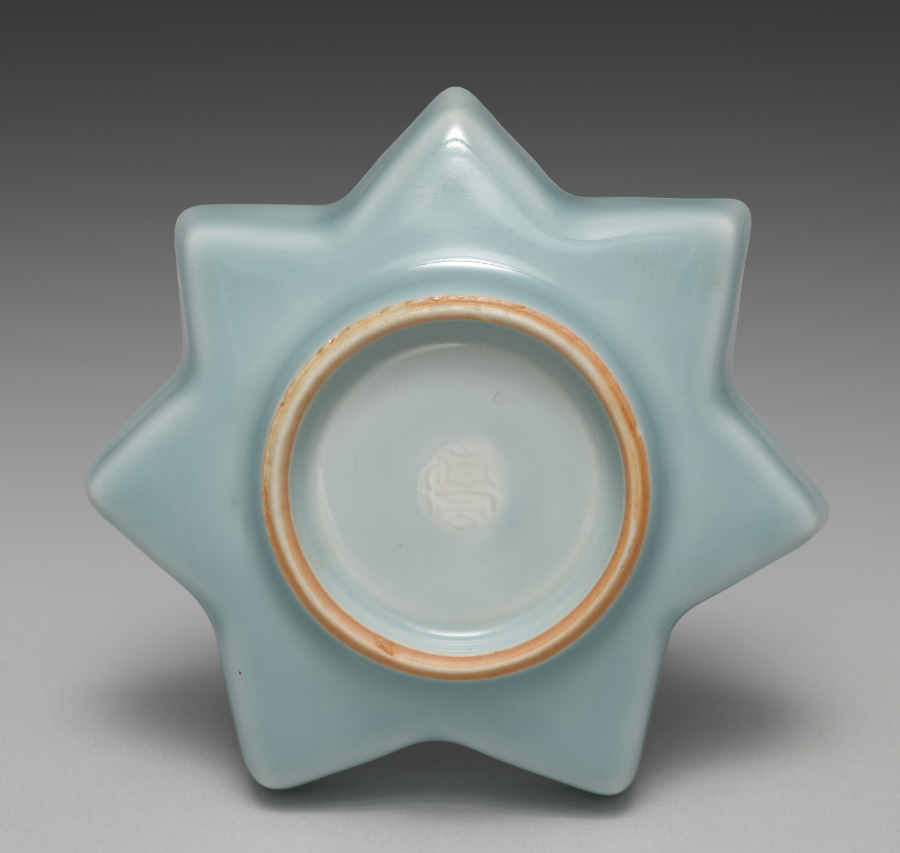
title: Saucer from Maple Leaf-Shaped Saucers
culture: Japan, Meiji period (1868–1912)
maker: Seifū Yohei III (Japanese, 1851–1914)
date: 1893–1914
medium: One of five dishes from a set of ten; porcelain with blue glaze and molded design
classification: Ceramic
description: These maple leaf–shaped saucers, like Yohei III's five shell saucers CMA 2022.188, have a long, horizontal box with a separate compartment for each piece. Now a set of five, these dishes were originally a set of ten, stored in two boxes of five each. From their housings, which accommodate differing numbers of objects, one can hypothesize that while some items created by the Seifu studio were intended to be acquired in larger sets, and thus were perhaps made to order, others, like these, may have been items to be purchased of the shelf in set quantities that allowed clients flexibility in scale. The box for these five saucers describes them as “heavenly blue[–glazed] porcelain” (tenseiji). The veins of the leaves are slightly raised in the clay so that the glaze pools around them and they stand out as white where the glaze thins. There are longer lines at the points of the leaves and shorter ones following the wall of each indentation so that the design has both a horizontal and a subtle vertical dimension.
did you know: These saucers shaped like maple leaves show Seifū Yohei III’s “heavenly blue glaze.”